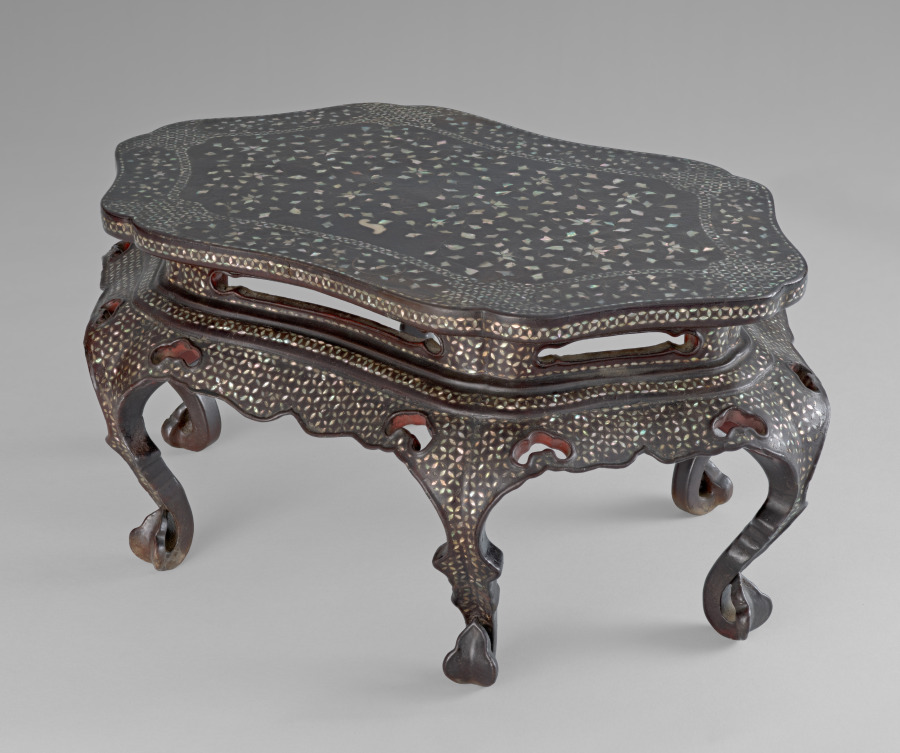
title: Hexafoil-Shaped Table with Mother-of-Pearl Inlay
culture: Korea, Joseon dynasty (1392–1910)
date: late 1400s–early 1500s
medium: Inlaid abalone shells on black lacquer ground, applied with red lacquer on the interior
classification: Lacquer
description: This low table showcases intricate mother-of-pearl and twisted brass-wire inlay forming chrysanthemum scrolls and floral lattices against black lacquer. As one of the few surviving early Joseon lacquer works employing the rare brass-wire technique, it reflects refined craftsmanship made for elite patrons. Likely used in Buddhist offering ceremonies, it would have supported precious ritual objects such as rolls of sutras or miniature Buddhist statuary.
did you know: The use of inlaid twisted brass wires in this mother-of-pearl lacquer table was first introduced in the twelfth century and is believed to have been employed in high-quality lacquerware through the end of the fifteenth century.